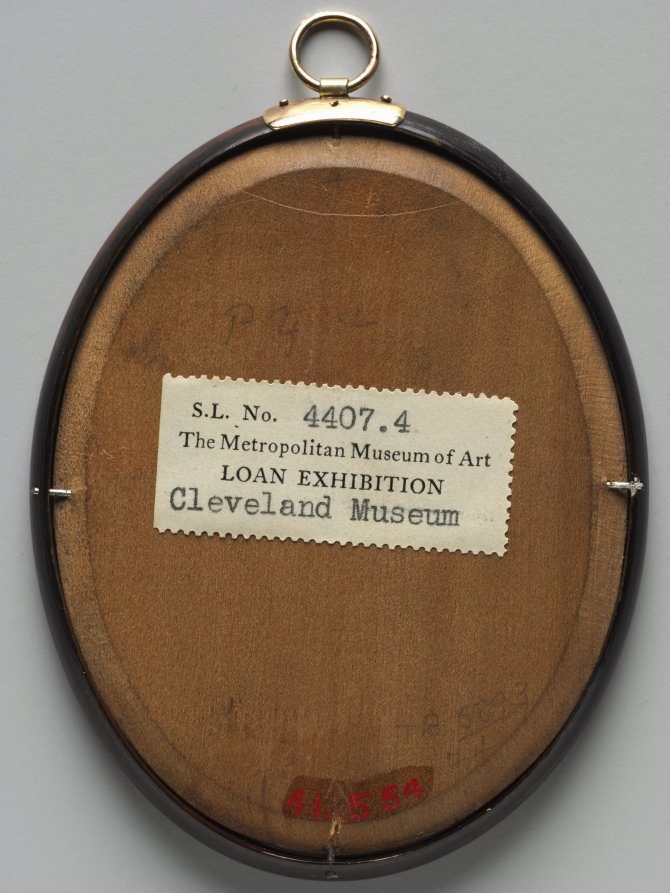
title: Portrait of a Woman in Blue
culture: England, early 18th Century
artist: Peter Cross (British, c. 1645–1724)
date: c. 1700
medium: watercolor on vellum in original ivory frame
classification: Portrait Miniature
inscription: signed right: PC [monogram]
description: Living in London, the youngest of seven children, Peter Cross was probably apprenticed to a limner following the death of his wealthy father. His first miniatures date from around 1661, and he remained active until his death, ushering the medium into the eighteenth century; the greatest British miniaturists working during his lifetime, all had died or ceased to work by 1700. Although ivory had been adopted as a support for British miniature painting a decade before his death, Cross exclusively used the older medium of vellum adhered to card. The artist was also an avid collector, assembling an impressive group of miniatures that included at least twelve works by his neighbor Samuel Cooper. This collection was sold in 1722 at Cross’s house in Covent Garden. Cross’s style is distinguished by a fi ne stippling of colors that combine to create soft, voluminous hair and pale flesh tones. His later works tend to leave the prepared white ground of the vellum bare—coincidentally, a strategy that was adopted by artists painting miniatures on ivory to exploit the support’s translucence. The details of his early instruction are still obscure, but some scholars have postulated that Cooper trained Cross, whereas others note a greater resemblance to the style of Hoskins, and still others detect a similarity to French stippling and suggest that he may have been trained overseas. The artist depicted the unknown sitter almost full face before a plain gray background with her head turned slightly to the right. She dons a white gown trimmed with ruffles at the neckline and a bright blue mantle over her right shoulder. Her powdered hair is swept up and loosely covered either by the blue mantle or a scarf of the same color.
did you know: This miniature is in its original ivory frame, stained a mottled brown to imitate tortoise shell.